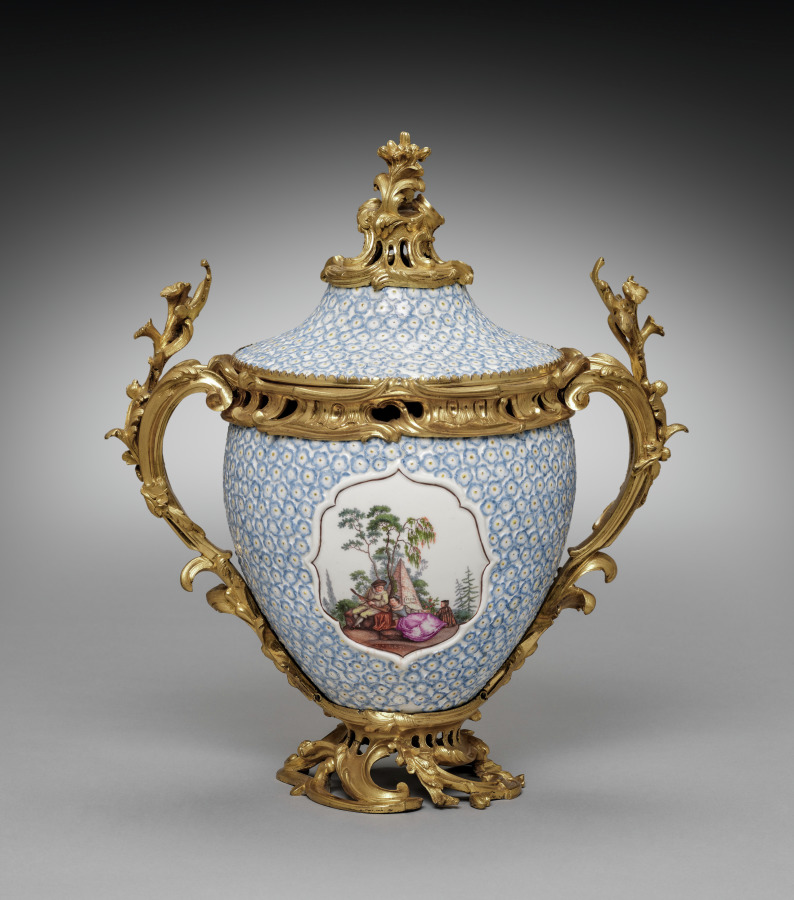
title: Covered Vase (2 of 2)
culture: Germany, Meissen, 18th century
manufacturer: Meissen Porcelain Factory (German, est. c. 1710)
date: mid-1700s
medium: porcelain mounted in gilt bronze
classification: Ceramic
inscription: on obelisk located in one of the cartouche openings, the date 1749 appears.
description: One of these vases is dated 1749. They were perhaps part of a set of four covered vases that we know from documents were acquired by Mme. de Pompadour, mistress of Louis XV in 1752.